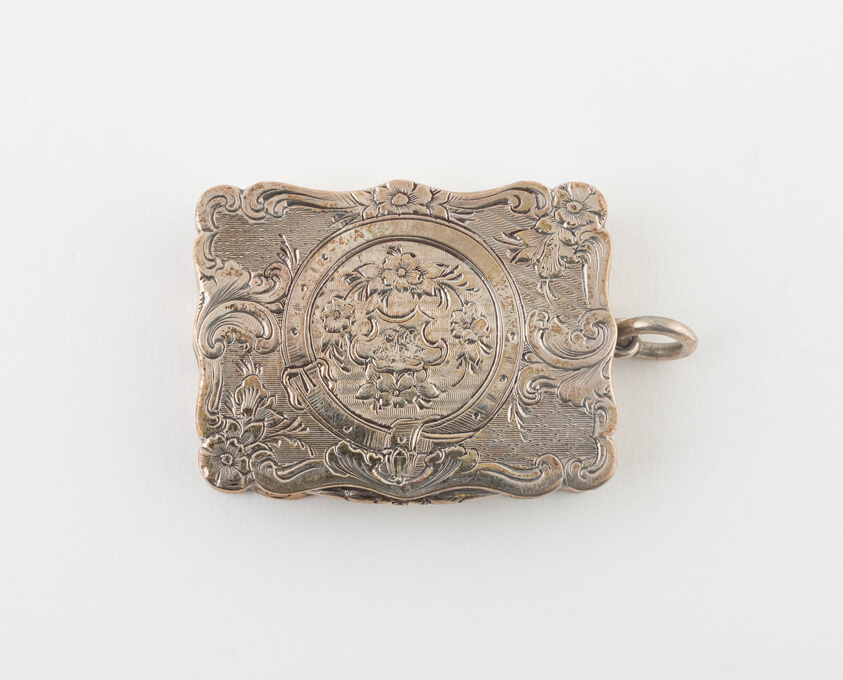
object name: Metalwork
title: Vinaigrette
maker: Marked A&S; Birmingham, England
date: c. 1857/58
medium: Silver and silver gilt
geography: Birmingham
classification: container for personal use; vinaigrette (container for health care); european decorative arts; metalwork; silver; decorative object/ornament